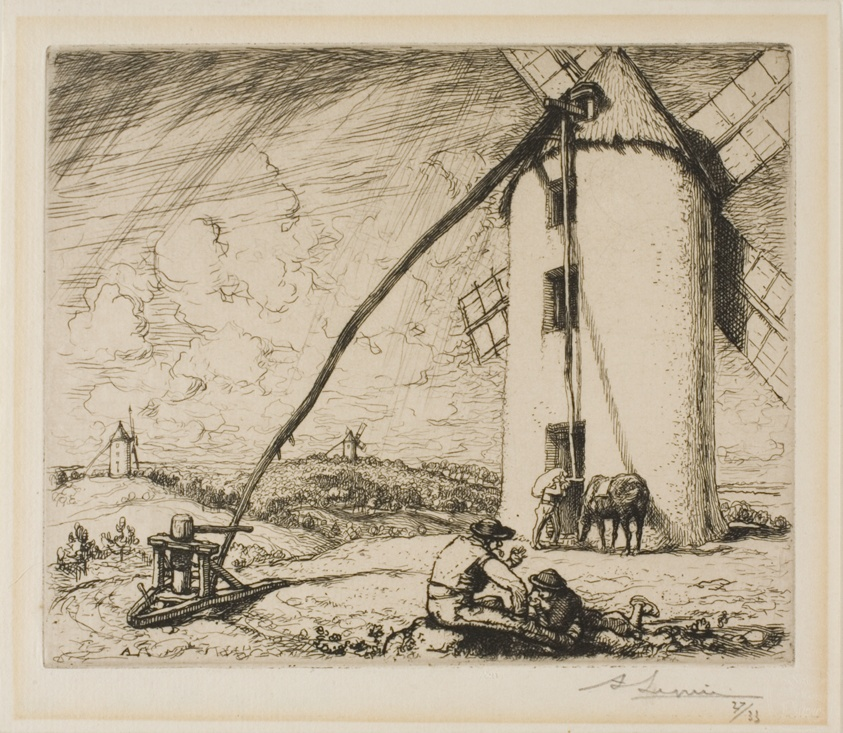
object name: Print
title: Le Moulin des Chapelles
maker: Louis Auguste Lepère (French, 1849-1918)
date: 1908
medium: Etching on cream laid paper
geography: France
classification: etching; print; prints and drawing